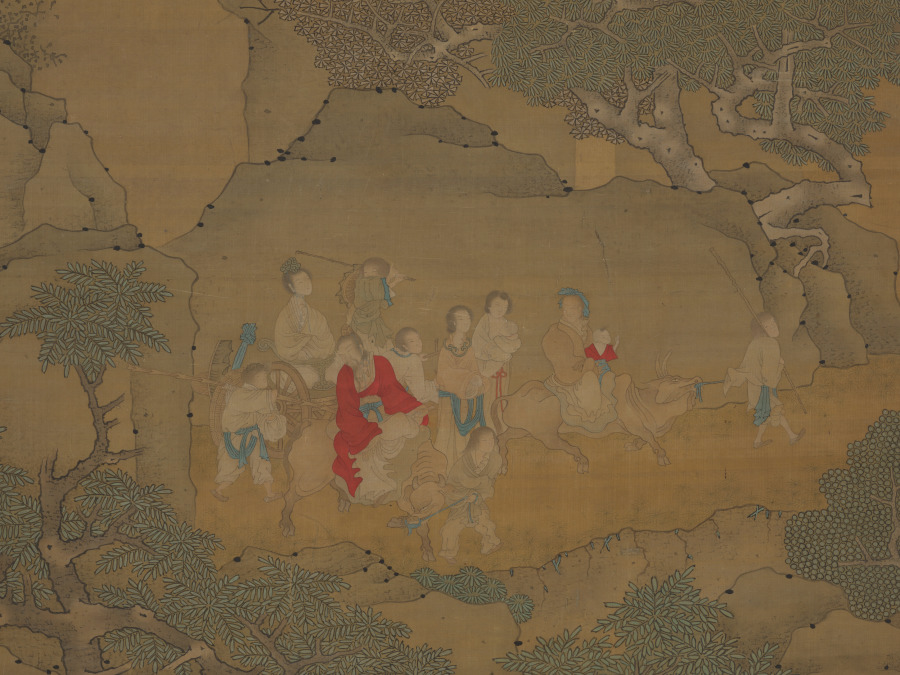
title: Xu Jingyang Moving His Family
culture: China, Ming dynasty (1368–1644)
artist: Cui Zizhong (Chinese, 1574–1644)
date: 1644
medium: Hanging scroll; ink and color on silk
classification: Painting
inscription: Artist's 2 seals: Pei-hai, Cui Zizhong yin.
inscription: 9 additional seals: 2 of Xiang Yuan (18th-19th c.); 1 of Tang Zuomei (late 18th-19th c.); 1 of Zhang Heng 張珩 (1915-1963); 1 of C. C. Wang 王季遷 (1907–2003); 4 unidentified.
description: Xu Jingyang was a dedicated fourth-century Confucian official who allegedly turned into a Daoist immortal. This scroll depicts the legend that when he attained immortality, he took his entire household, including chickens and dogs, to paradise. Cui Zizhong’s painting style intentionally referenced ancient masters. Typical of the pre-Song dynasty landscape tradition, there is the use of blue and green colors and an emphasis on outline rather than texture. While the trembling outlines are reminiscent of earlier painters, the flickering light on rocks and trees is a stylistic feature of Cui’s own time.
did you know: Xu Jingyang, wearing red, is in the upper register of figures, while below his servants transport a rooster, dog, and other supplies.